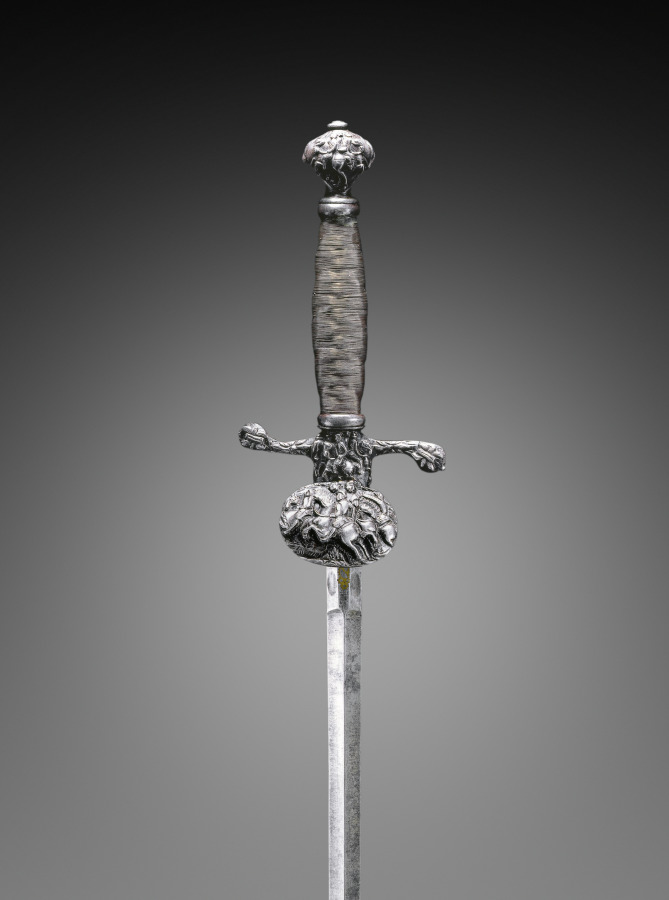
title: Small Sword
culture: France, 18th century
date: 1700s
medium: steel, copper alloy inlays; wood grip with steel wire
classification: Arms and Armor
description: The small-sword was a civilian thrusting weapon customarily worn by well-to-do gentleman in civilian dress during the weapon's heyday in the 1700s, and were later worn on formal or court occasions. They were traditionally suspended at about mid-thigh from the left side of the belt, the gilt exposed through an opening in the gentleman's coat. Since it was highly visible it was subject to lavish decoration with precious materials and fashions came and went. Many were decorated to match personal costume and were truly an emblem of social rank.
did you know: The banded pattern on the hilt was achieved by carefully winding wire over a wooden core. The result was a handle with a textured surface that improved the user's grip.